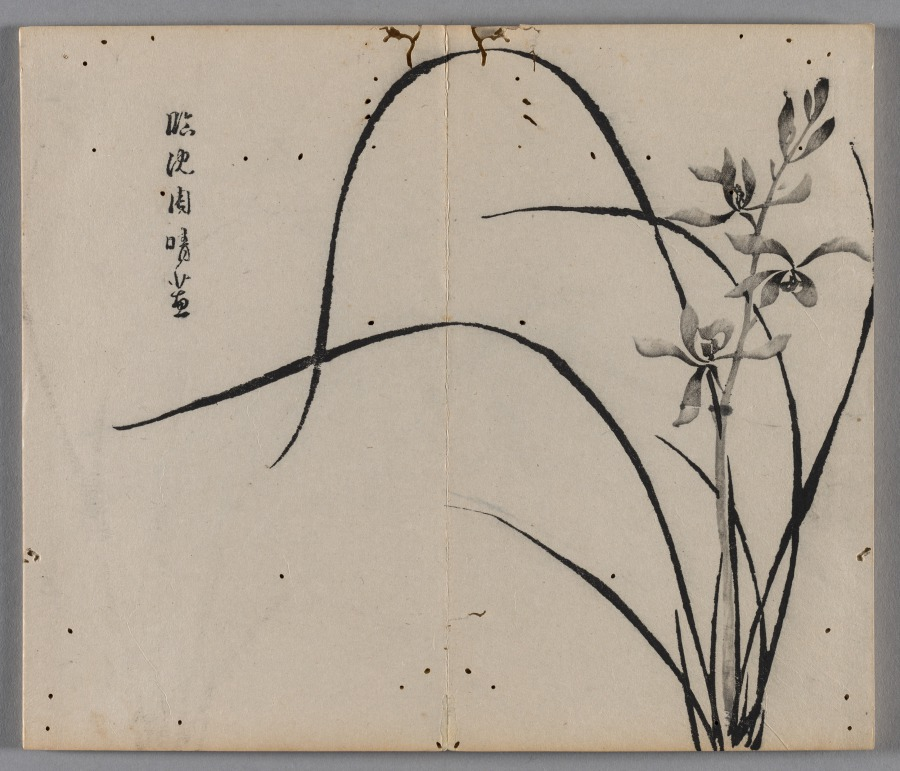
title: Ten Bamboo Studio Painting and Calligraphy Handbook (Shizhuzhai shuhua pu): Orchids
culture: China, Qing dynasty (1644-1911)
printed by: Hu Zhengyan (Chinese, c. 1584–1674)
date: 1633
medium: Woodblock-printed book; ink and colors on paper; first edition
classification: Print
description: Color printing reached a level of perfection in the early 1600s, as seen in this Ten Bamboo Studio Collection of Calligraphy and Painting and the Mustard Seed Garden Manual of Painting (printed 1679 and 1701). The painterly quality, precision in registering (aligning) the woodblocks, and harmonious colors made them the most successful color print editions in Chinese history. Both editions were printed and compiled in Nanjing, spread nationwide, and had a great impact on the arts in Japan and Korea.